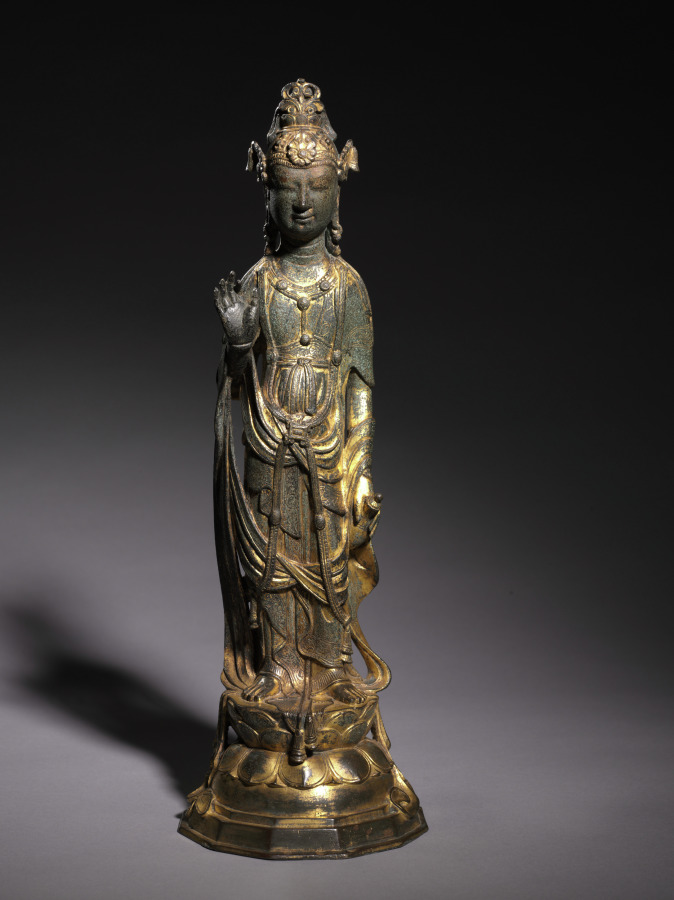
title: Bodhisattva Guanyin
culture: China, Liao dynasty (916-1125)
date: 900s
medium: gilt bronze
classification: Sculpture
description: In Buddhism, a bodhisattva is a being who, just before reaching enlightenment, turns back to assist others to reach enlightenment first. This bodhisattva holds his hand palm forward, in a gesture that tells followers not to fear. In his other hand he carries a bottle that holds the elixir of immortality.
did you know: The Liao rulers were devout Buddhists who commissioned substantial religious projects.